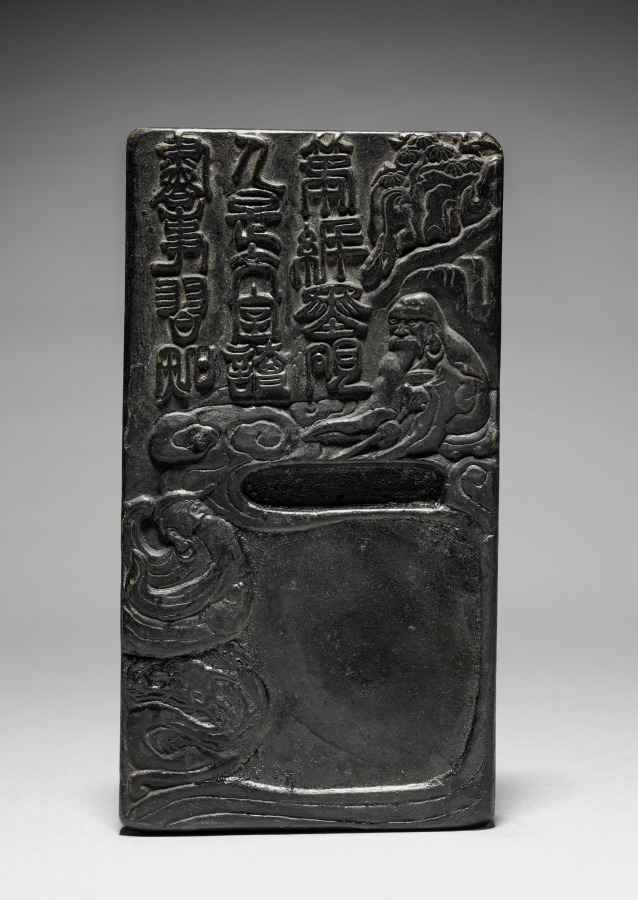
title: Ink Cake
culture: China, Ming dynasty (1368–1644)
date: 1368–1644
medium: ink cake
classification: Miscellaneous